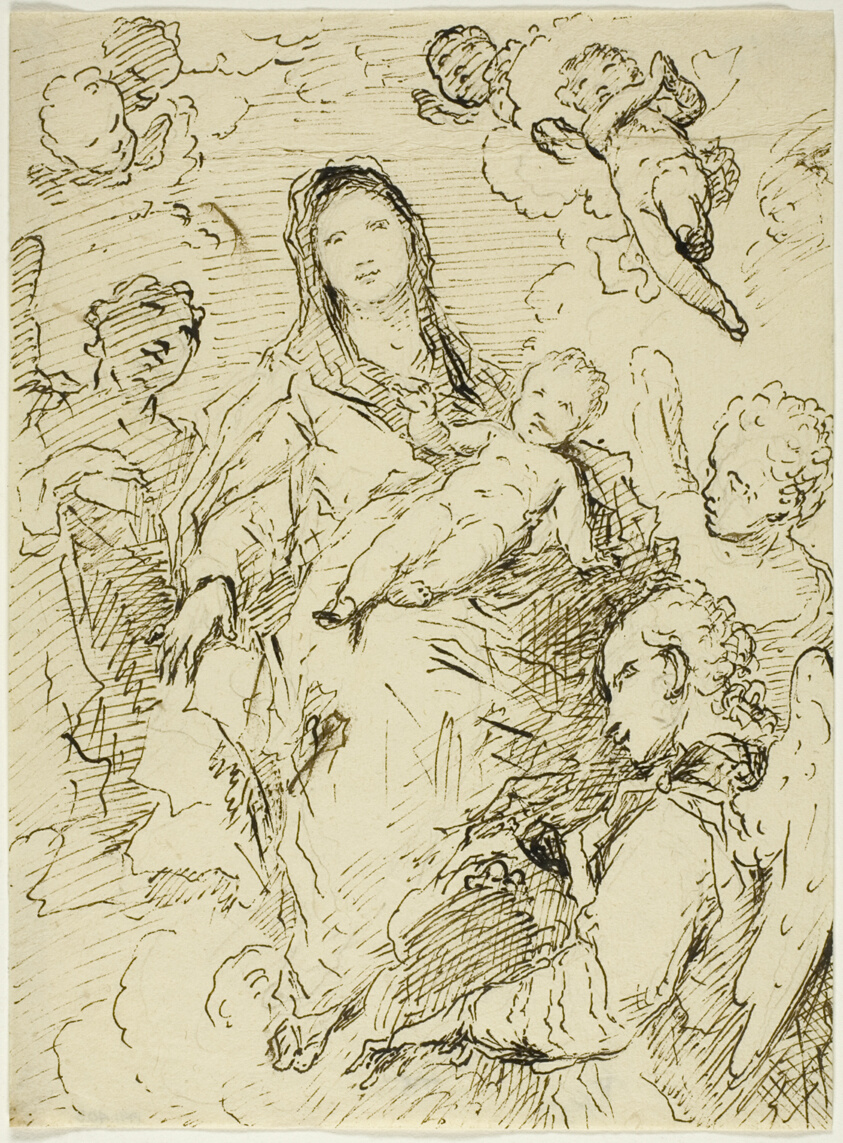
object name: Drawing and Watercolor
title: Virgin and Child with Angels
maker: Unknown artist; Venetian, 18th century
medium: Pen and brown ink, over traces of graphite, on ivory laid paper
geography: Italy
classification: pen and ink drawings; drawings (visual works); prints and drawing